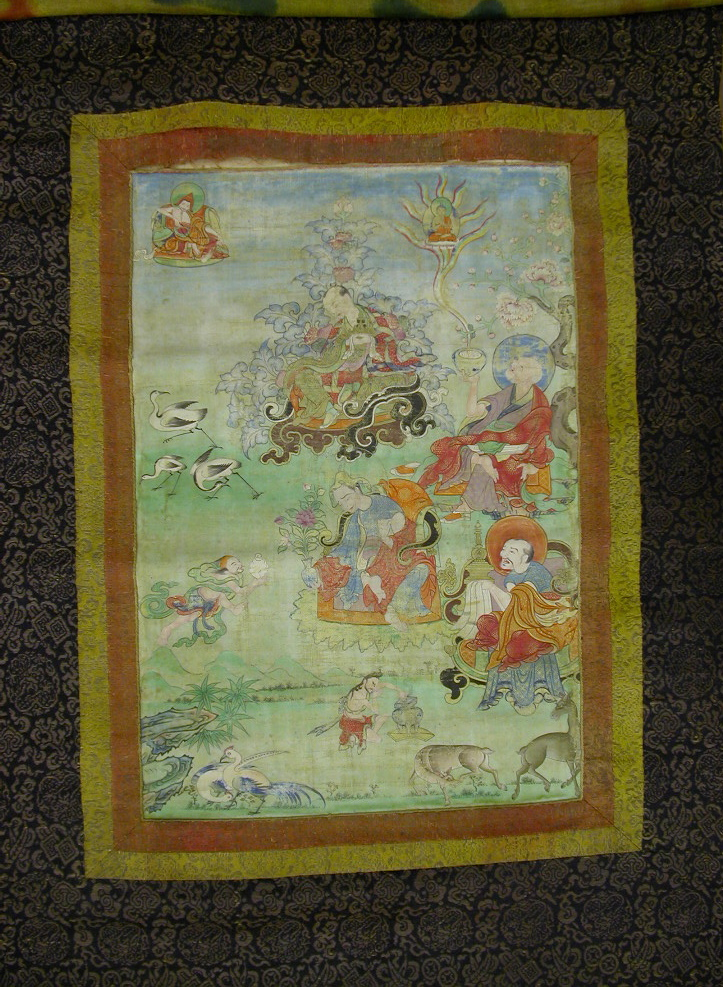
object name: Painting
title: Painted Banner (Thangka) from a Set of Seven Honoring Gayadhara, a Sakya Pandit from India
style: Himalayan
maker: Tibet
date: 19th century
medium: Pigment on cloth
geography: Tibet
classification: hanging scroll; asian art; painting